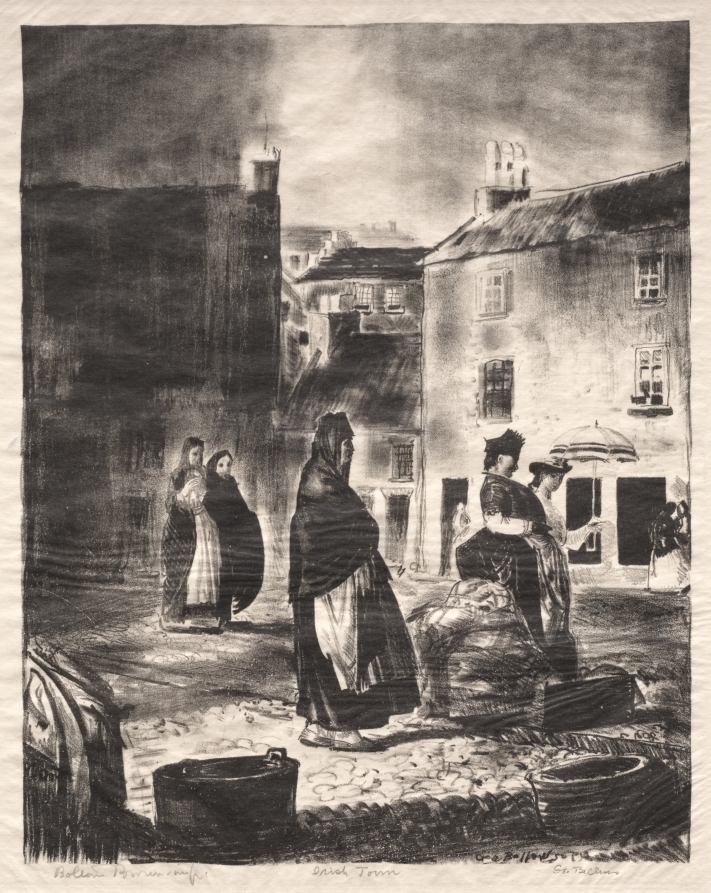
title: Irish Town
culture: America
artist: George Bellows (American, 1882–1925)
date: 1923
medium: lithograph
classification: Print